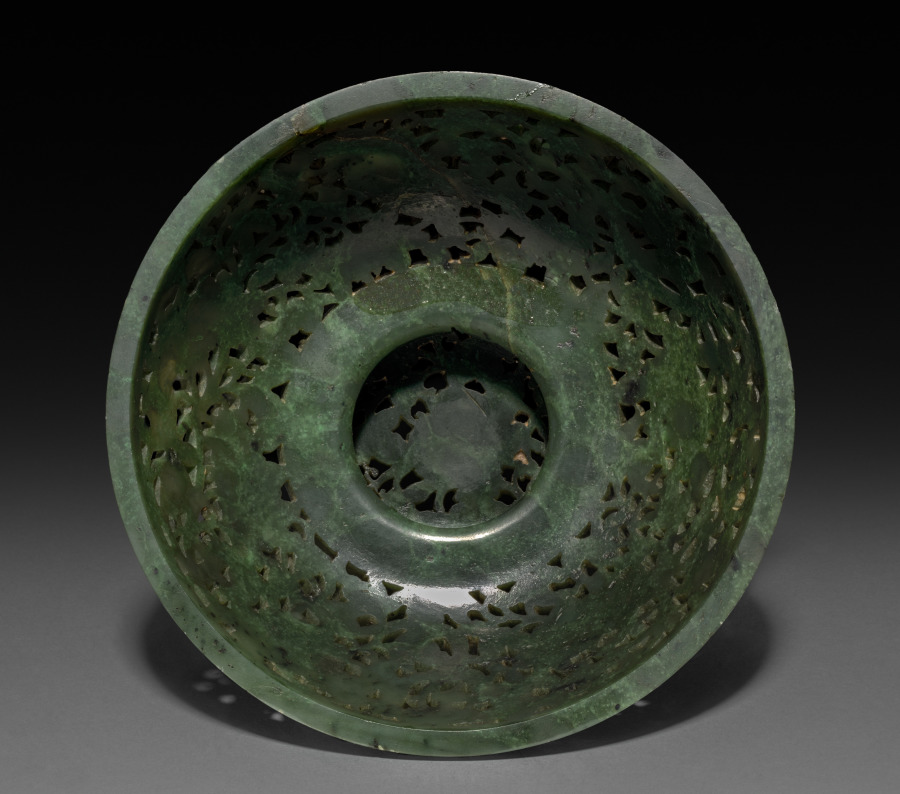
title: Fragrance Container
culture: China, Qing dynasty (1644–1911), Qianlong reign (1736–95)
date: 1736–95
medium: jade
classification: Jade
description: In the Qing (1644–1911) dynasty, luxury items became more affordable to larger parts of the society, including women, merchants, and literati in non-official positions. Imperial patronage and a growing urban population encouraged consumption of luxury goods and local craftmanship. This spinach-green jade incense burner has pierced floral designs and four pierced floral handles. It illustrates the superb carving skills and the creative mind of its accomplished creator, who sought clients on a competitive market.